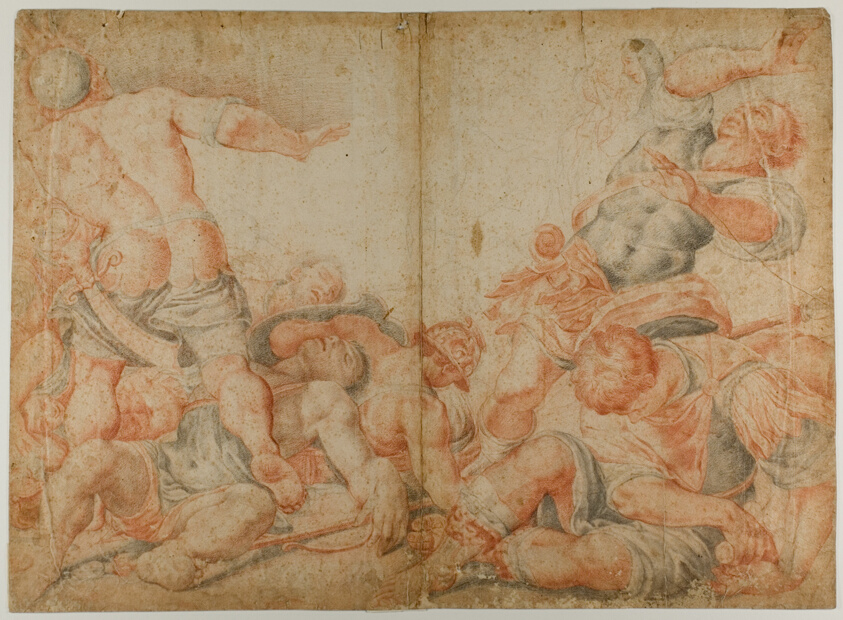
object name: Drawing and Watercolor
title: Resurrection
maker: after Santi di Tito; Italian, 1536-1603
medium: Red and black chalk on ivory laid paper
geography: Italy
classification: chalk; drawings (visual works); prints and drawing